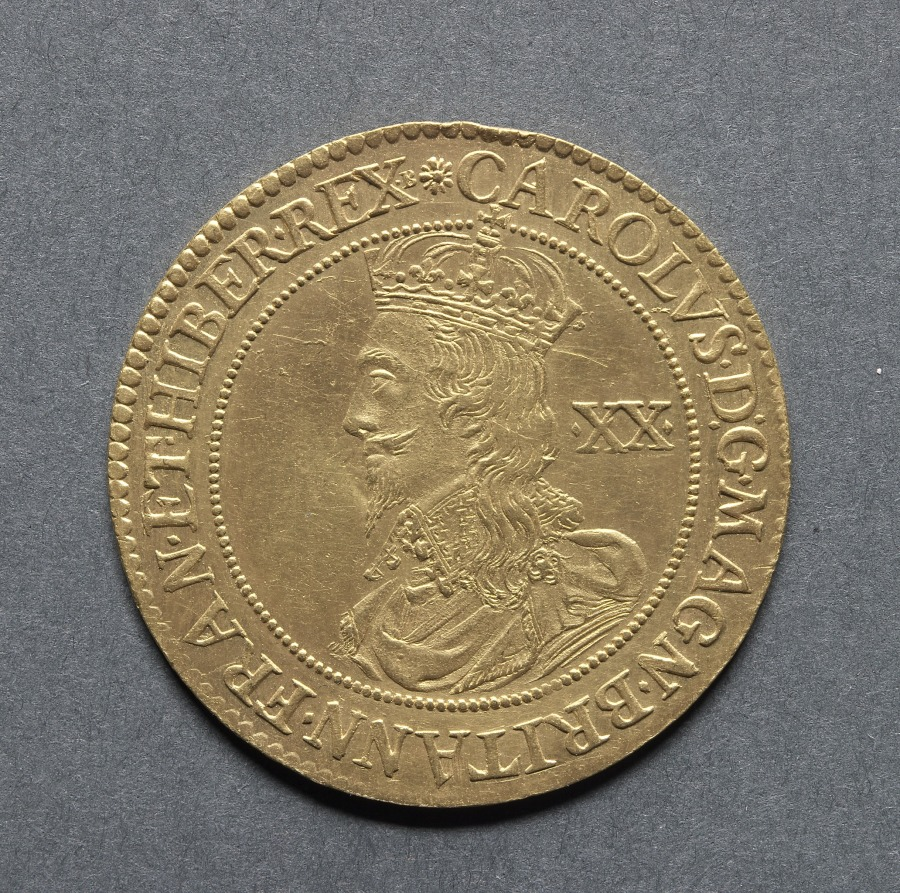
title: Unite: Charles I (obverse); Crowned Shield (reverse)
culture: England, Charles I, 1625-1649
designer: Nicholas Briot (French, c. 1579–1646)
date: 1631–32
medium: gold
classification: Coins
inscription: CAROLVS∙D:G∙MAGN∙BRITANN∙FRAN∙ET∙HIBER∙REX, XX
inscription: FLORENT∙CONCORDIA∙REGNA C R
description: In 1625 Nicholas Briot traveled from Paris and obtained employment in England. In 1628 he was commissioned to design portraits and in 1631 records show that he was working at the Tower Mint. On his first appointment he was authorized to install machines for striking medals. He was formally empowered on February 11, 1629, to extend their use to experiment on coining. The results were scrutinized in 1631 by a royal commission and the following year he was formally appointment as engraver-general in England and had an augmented salary of 300 pounds. From then until 1638 Briot minted a small fraction of the gold and silver coin by machine. By means of the even pressure of the screw press on a rolled planchet obtained from the rolling mill, and by a collar that kept the metal from flowing unevenly, Briot was able to produce a neat round coin. His fame, however, is that he was the finest die-cutter England had known since Alexander of Brugsal engraved the famous profile portrait of Henry VIII (1485–1509). Like Eloy Mestrelle (1561), Briot met with great opposition from his co-workers, but because of his great artistic ability he was backed by King Charles I and no one could displace him. During the English Civil War he was retained by the Tower, but his influence can be seen in some of the coins struck at Oxford and York, and he also worked in Scotland on some of the Scottish coins. He died in 1646, four years after the war had started.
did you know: This was the first coin milled or produced by machine in England, previously all issue was hand struck.